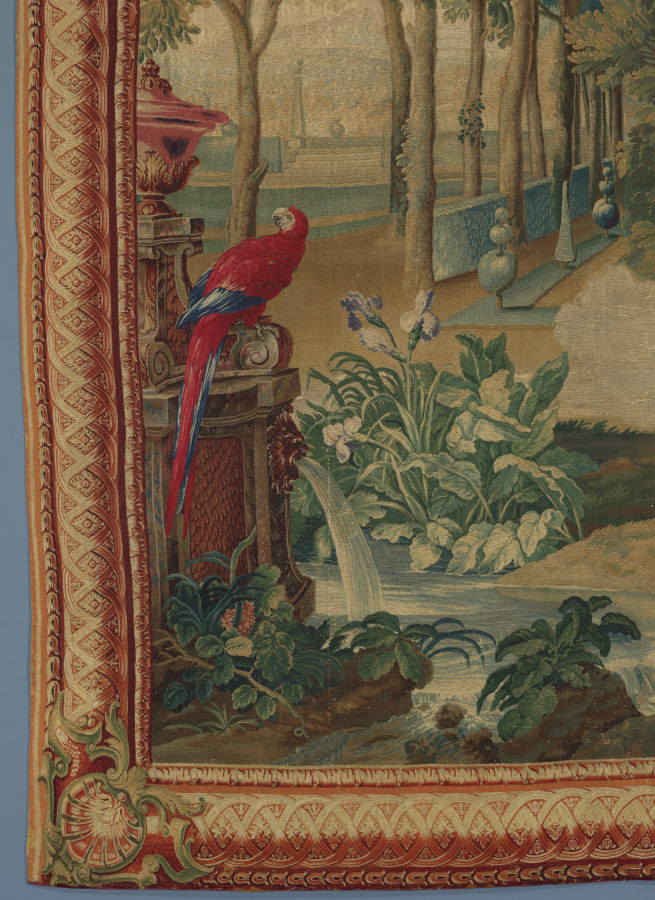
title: Flora and Zephyrus (from Set of Ovid's Metamorphoses)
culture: France, 18th century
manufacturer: Gobelins Manufactory (France, Paris, est. 1662)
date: 1704–1731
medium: tapestry weave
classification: Tapestry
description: In an abundant garden of trees and flowers, the goddess Flora sits beneath a vase of luscious flowers as her husband, the west wind Zephyrus, carried by a white cloud, reaches out to crown her with a floral chaplet. In this tapestry, Zephyrus’s wings resemble those of a butterfly or moth rather than a bird. The ravishing landscape echoes Flora and Zephyrus as springtime divinities. The parrot in the foreground is a colorful intermediary between the viewer and the gods represented in this tapestry.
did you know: During the French Revolution, Gobelins tapestries were sometimes disassembled to harvest the gold threads.